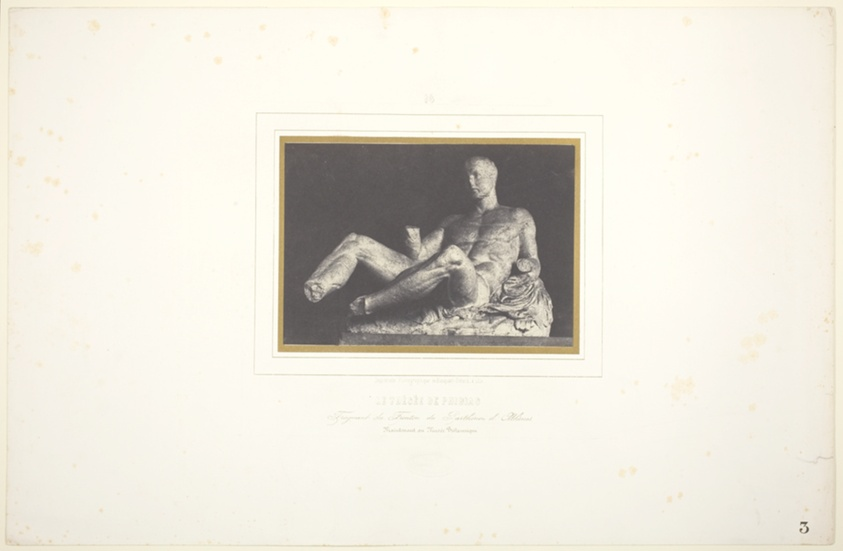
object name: Photograph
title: Le Thésée de Phidias/ Fragment du Fronton du Parthenon d'Athènes/ Maintenant au Musée Britannique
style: 19th century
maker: Louis-Désiré Blanquart-Evrard (French, 1802–1872)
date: 1851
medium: Salted paper print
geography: France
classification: salted paper print; photographic process; photography; photograph